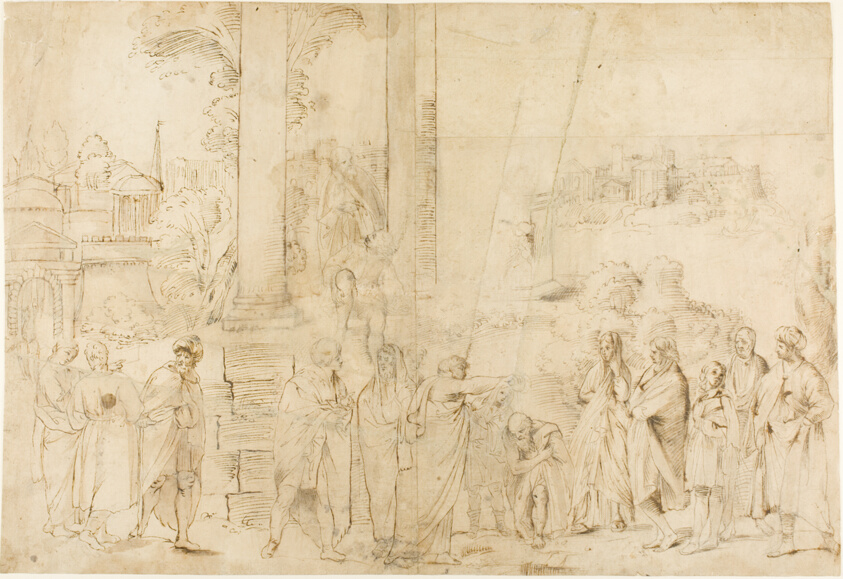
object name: Drawing and Watercolor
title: Saint Paul Baptizing Dionysus the Areopagite (recto); Sketches of Baby, Hands (verso)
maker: After Antonio Carracci; Italian, 1583-1618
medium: Pen and black and brown ink, with brush and brown wash, over graphite (recto), and pencil and red chalk (verso), on tan laid paper (pieced)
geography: Italy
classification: drawings (visual works); prints and drawing